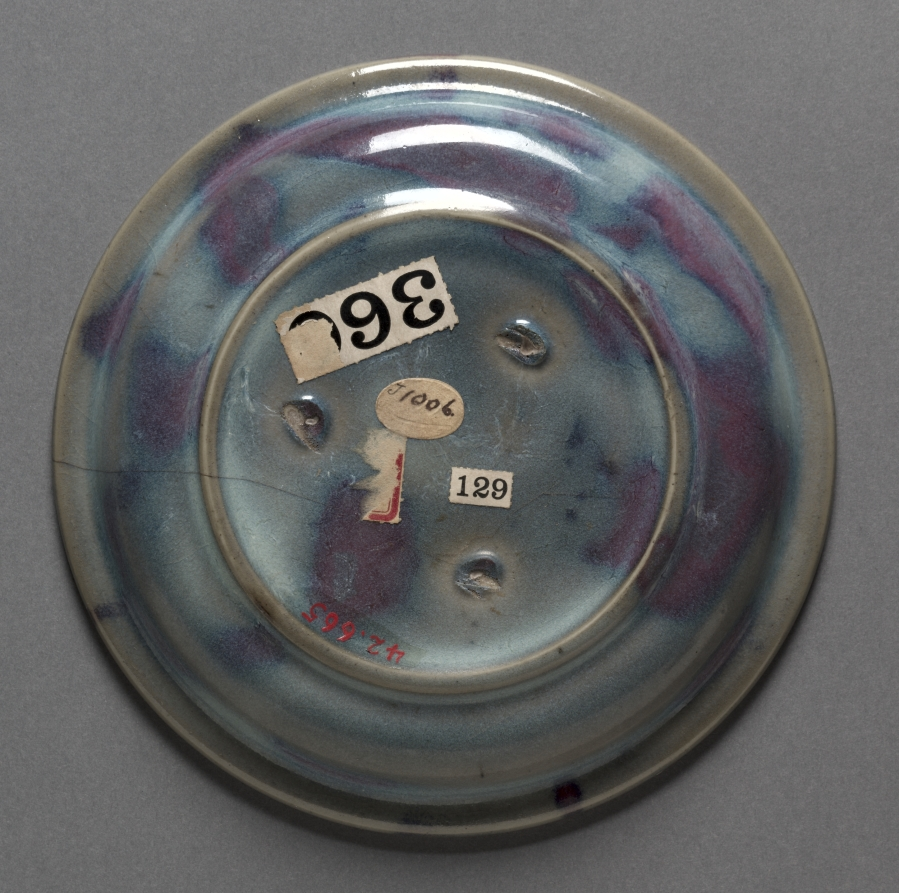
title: Plate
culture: Northern China, Northern Song dynasty (960-1127) - Jin dynasty (1115-1234)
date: 1100s–1200s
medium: Stoneware with mottled glaze, Jun ware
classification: Ceramic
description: This shallow plate's light gray stoneware body is covered with a thick glaze of intense robin's egg blue suffused with deep amethyst patches.